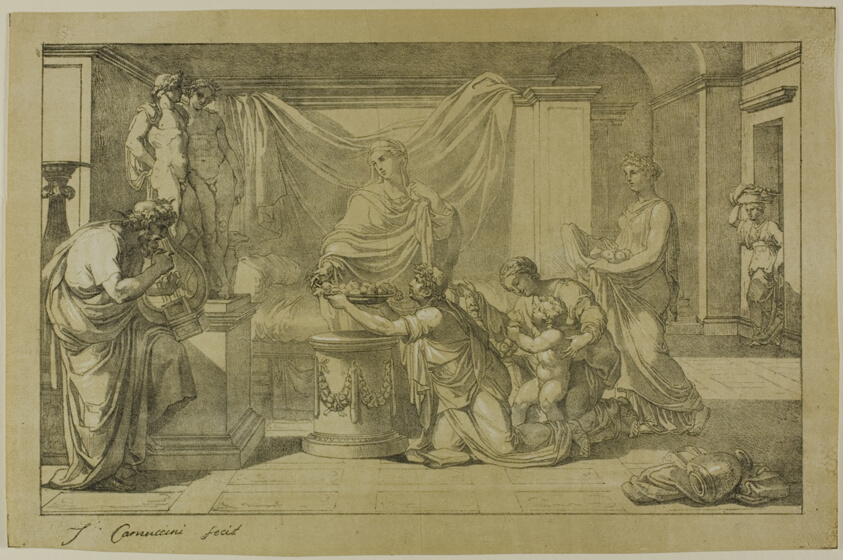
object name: Print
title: Offering to Lares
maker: Vincenzo Camuccini (Italian, 1771-1844); printed by Alois Senefelder (German, 1771-1834)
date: 1810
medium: Lithograph on paper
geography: Italy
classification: lithograph; print; prints and drawing